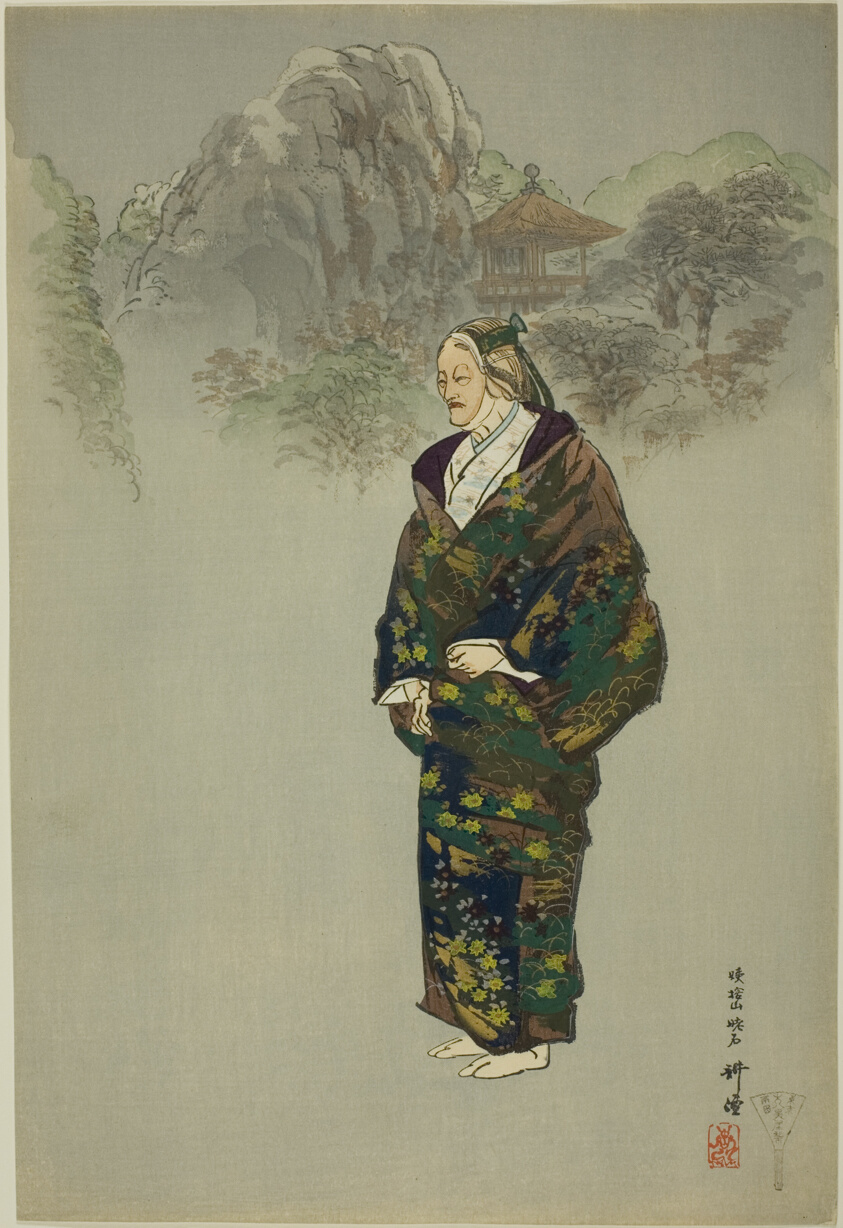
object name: Print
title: Oba-sute, from the series "One Hundred No Dramas (Nogaku hyakuban)"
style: Japanese (culture or style)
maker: Tsukioka Kogyo; Japanese, 1869-1927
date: 1898/1903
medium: Color woodblock print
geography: Japan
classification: woodblock print; print; asian art